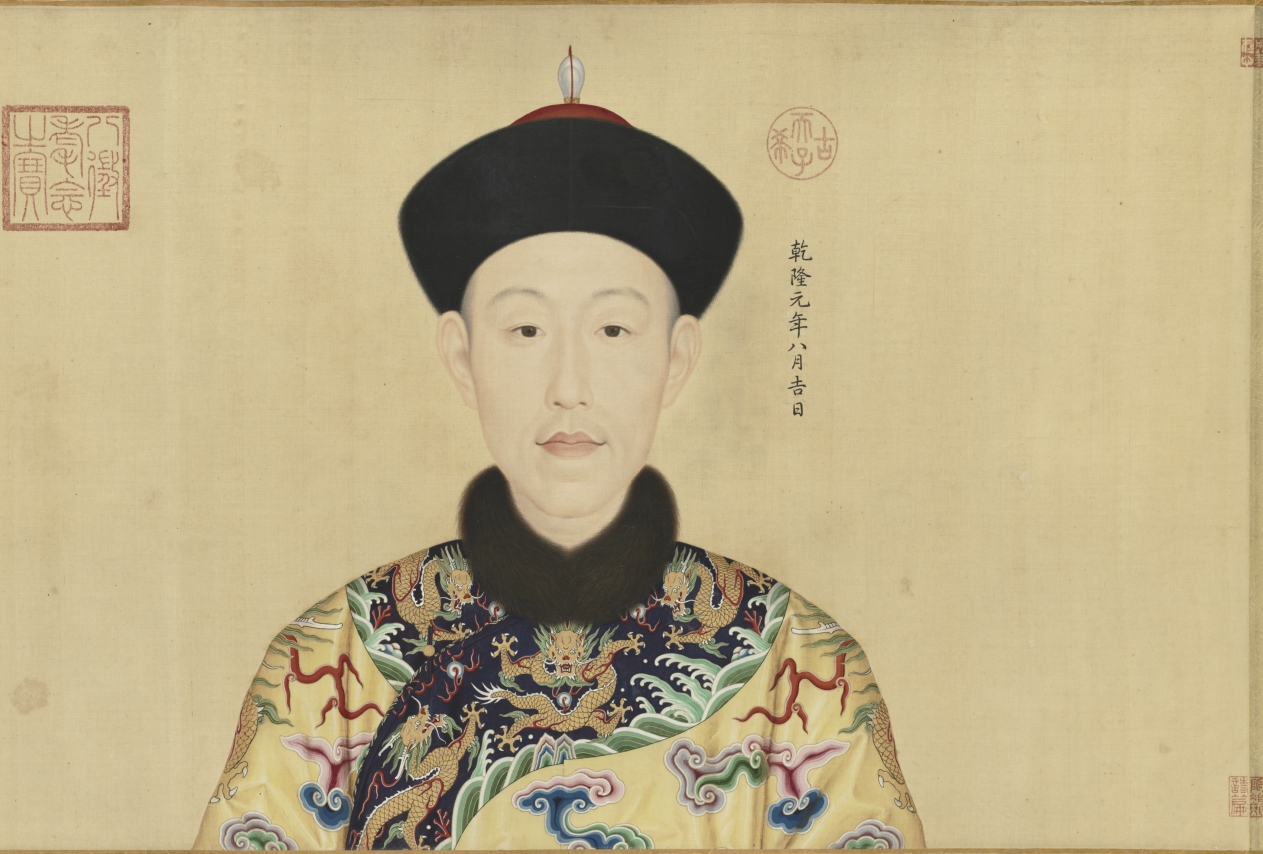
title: Portraits of the Qianlong Emperor and His Twelve Consorts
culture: China, Qing dynasty (1644–1911), Qianlong reign (1736–95)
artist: Giuseppe Castiglione (Italian, 1688–1766)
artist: and others (Chinese)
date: 1736–70s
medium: Handscroll; ink and color on silk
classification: Painting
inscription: 9 seals of the Qianlong emperor (r. 1736–95).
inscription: The eighth month, first year of Qianlong [1736] 乾隆元年八月吉日. The Empress (Xiaoxian) 皇后 (1712–1748), The Guifei (Huixian) 貴妃 (?-–1745), Chunfei 純妃 (1713–1760), Jiafei 嘉妃 (?–1755), Lingfei 令妃 (1727–1775), Shufei 舒妃 (1728–1777), Qingbin 慶嬪 (1724–1774), Yingbin 穎嬪 (1731–1800), Xinbin 忻嬪 (?–1764), Dunfei 惇妃 (1746–1806), Xunfei 順妃 (1749–1788), Shunbin 循嬪 (?–1797).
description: This portrait shows the Qianlong emperor at 26, in the first year of his reign. His likeness is followed by portraits of the empress and eleven consorts. Their portraits document the appearances of the court women around the time when they received their respective imperial titles, which occurred at different stages of the emperor's life. The first three portraits were done by the Jesuit (Roman Catholic) missionary artist Giuseppe Castiglione, whereas the later ones were by Chinese court painters. Formal portraiture contributed to the affirmation of status and construction of role and identity. This scroll served as both familial documentation and a "mind picture" of the Qianlong emperor, suggesting that his constructed image of emperorship was inseparable from concepts of self and family. It was stored in a carved red lacquer box bearing the original painting title Mind Picture of a Well-Governed and Tranquil Reign (see CMA 1969.32).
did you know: Lingfei 令妃 (1727–1775), the first consort depicted in the maroon or “incense-colored" 香色 robe, was the mother of six of Qianlong’s children, including the future Emperor Jiaqing.